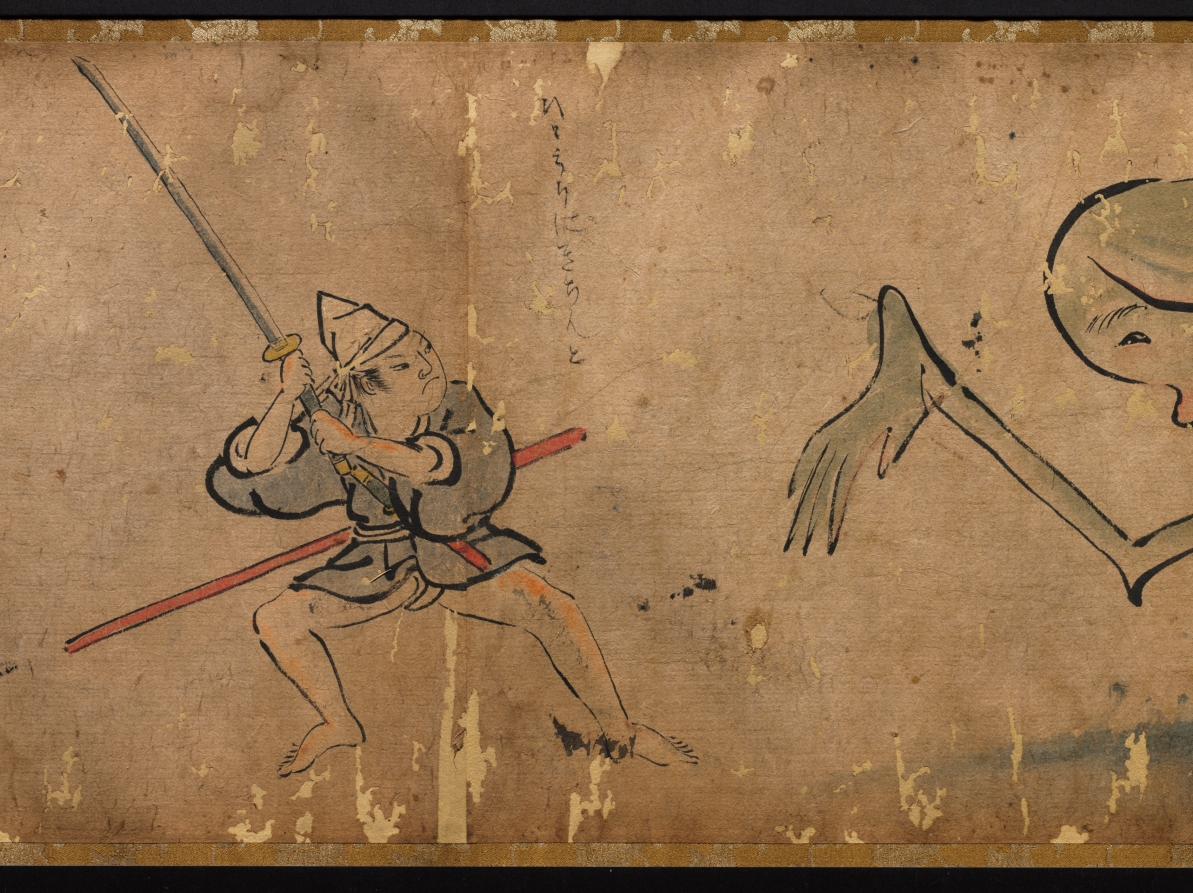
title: The Illustrated Tale of Oishi Hyōroku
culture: Japan, Edo period (1615–1868)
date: 1700s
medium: handscroll; ink and color on paper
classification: Painting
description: This incomplete handscroll illustrates part of the story of Oishi Hyoroku, a young man tasked with battling fox apparitions who were creating problems in his town. In other extant versions of the scroll, the story is set in the fall of 1624 in Kagoshima in southern Japan. Throughout the story, Hyoroku is tricked and terrified by the foxes that shift their shapes into a variety of monstrous phantoms. After repeated humiliations, he eventually captures two of the foxes. In this version, colloquial texts that function like text blurbs in comics appear throughout the scroll, but the main text is missing.